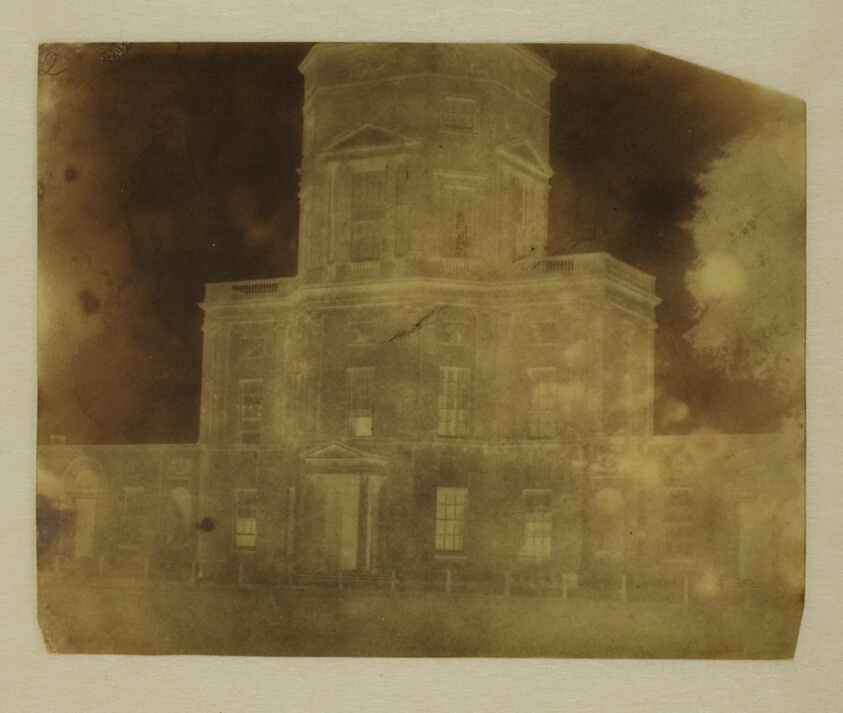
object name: Photograph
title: Base of Radcliffe Library, Oxford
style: 19th century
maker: William Henry Fox Talbot (English, 1800–1877)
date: July 29, 1842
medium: Calotype paper negative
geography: England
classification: calotype negative; negative; negative/transparency; photography; photograph